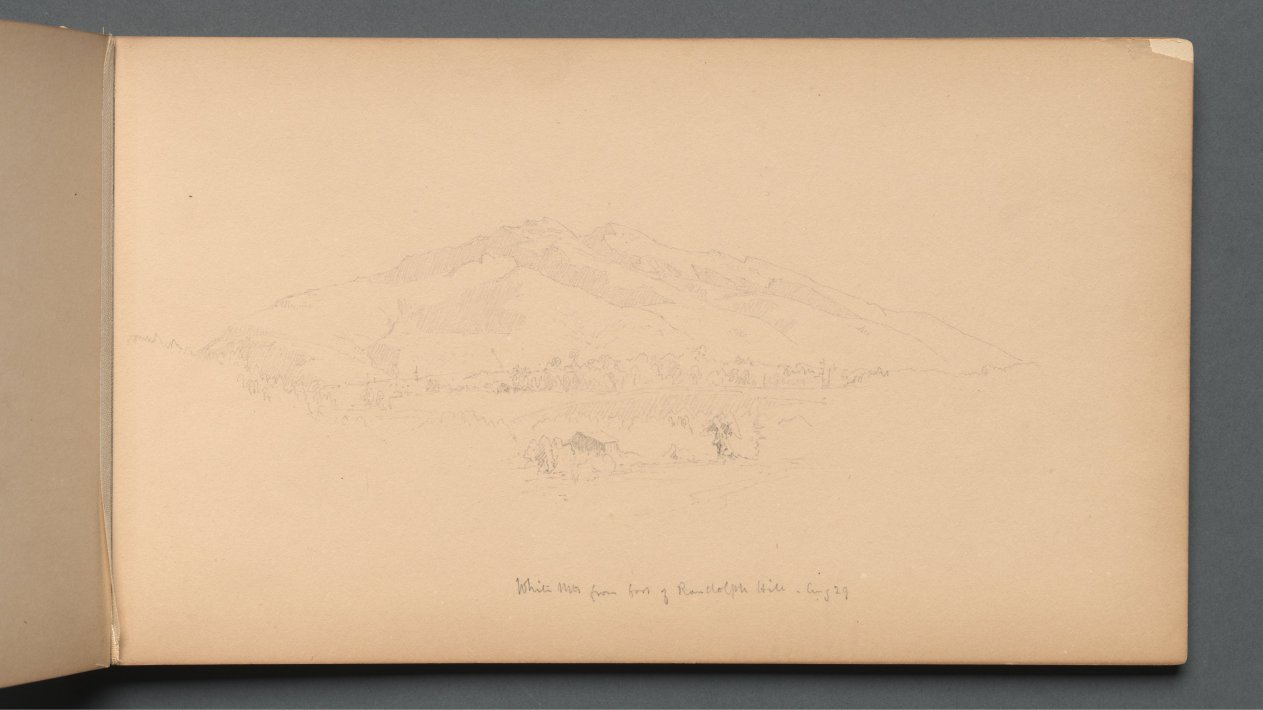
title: Sketchbook, page 12: "White Mountians from foot of Randolph Hill"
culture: America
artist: Sanford Robinson Gifford (American, 1823–1880)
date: 1859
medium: graphite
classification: Bound Volume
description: Gifford was an American landscape painter belonging to the second generation of Hudson River school artists. Based in New York City with a studio at the Tenth Street Studio Building, Gifford took annual summer trips to the Catskills, the Adirondacks, and other scenic locations in New England. This sketchbook accompanied the artist on his expedition in 1859 to New Hampshire and Maine, where he drew sites such as Dixville Notch, the White Mountains, and Peaks Island, Casco Bay. Gifford used such graphite studies as the basis for oil paintings worked up in his studio, such as A Home in the Wilderness (1866).